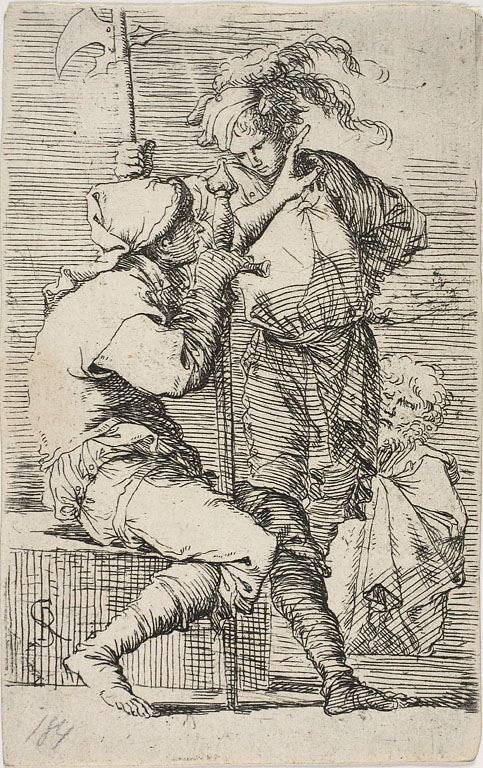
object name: Print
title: Two warriors, one holding a sward, the other a halberd; an old brearded man behind them, from Figurine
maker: Salvator Rosa (Italian, 1615-1673)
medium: Etching on ivory laid paper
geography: Italy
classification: etching; print; prints and drawing